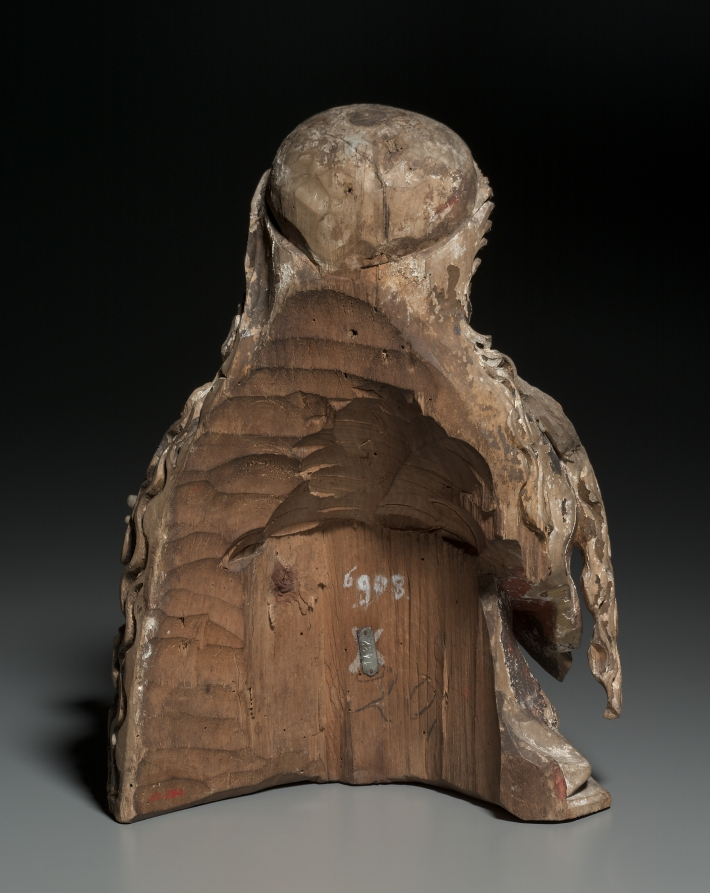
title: Female Bust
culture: Austria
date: c. 1470–1500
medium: painted and gilded lindenwood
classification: Sculpture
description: This female bust is part of a series of three in the museum's collection. The identity of the figures has been speculated by scholars but without resolution. Because this and the other female busts in the series do not retain their attributes, it is difficult to know their original purpose. It is possible that they may have once formed a group of female saints from the predella of a large altarpiece. Since the sculpture is not carved in the round, this hypothesis has merit. Another recent proposal is that this and the other sculptures may be from a series of female busts representing the wise and foolish virgins referenced in Matthew 25:1-13, a parable by Jesus admonishing listeners to be spiritually prepared.